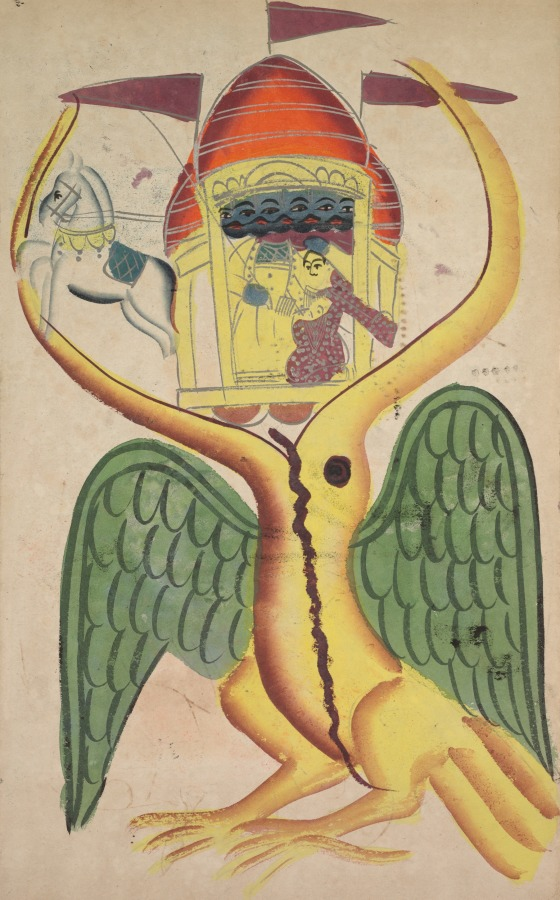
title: Jatayu hinders Ravana’s chariot, trying to prevent the abduction of Sita (recto), from a Kalighat album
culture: Eastern India, Bengal, Kalighat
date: c. 1890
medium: Gum tempera, graphite, and tin on paper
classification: Painting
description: With his colossal u-shaped beak and green wings, the ruler of the vultures, Jatayu, appears assured of victory against the multiheaded demon lord Ravana. This scene, the battle between Jatayu and Ravana, was especially subject to variation. In the Bengali Ramayana, Jatayu initially swallows Ravana—aerial chariot and all—but vomits the villain when he realizes Sita, the wife of his friend Rama, is also aboard. Later, Ravana fatally wounds Jatayu and takes Sita as his prisoner. Doing so sets in motion the events that lead to Ravana’s downfall at the hands of Rama, the only being capable of ending the demon’s reign.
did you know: The underdrawing of this painting was done in graphite and is visible in some areas.